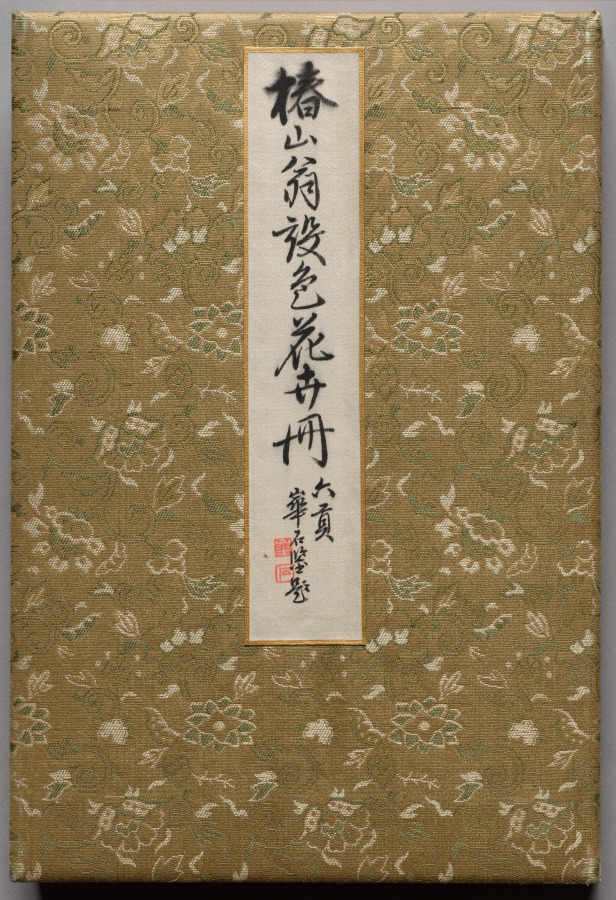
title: Flowers and Grasses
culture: Japan, Edo period (1615–1868)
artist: Tsubaki Chinzan (Japanese, 1801–1854)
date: 1841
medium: folding-album with six leaves of paintings; preface in ink on paper; paintings in ink and color on silk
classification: Bound Volume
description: This album contains six small paintings, each of which takes a different plant as its subject. The paintings include depictions of pomegranates, as well as flowering narcissus and orchid.